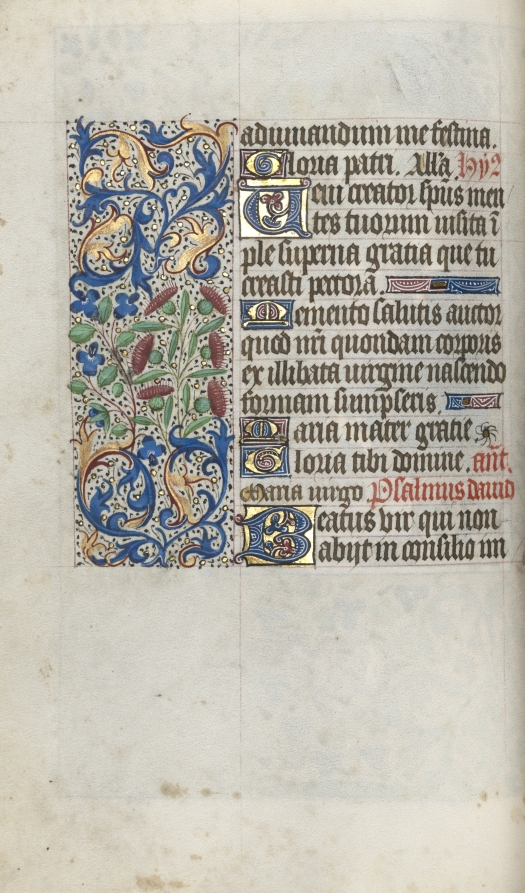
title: Book of Hours (Use of Rouen): fol. 56v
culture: France, Rouen, 15th century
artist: Master of the Geneva Latini (French, active Rouen, 1460–80)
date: c. 1470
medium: ink, tempera, and gold on vellum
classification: Bound Volume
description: In the late 1400s and early 1500s Rouen was an established and important center of book production. The city’s cathedral had a wealthy chapter that spent large sums of money to commission books and to maintain its extensive library. The stationers and booksellers would have likely been concentrated in or near the cathedral precinct. This artist, named after a manuscript now in Geneva, was Rouen’s principal illuminator during the second half of the 1400s.